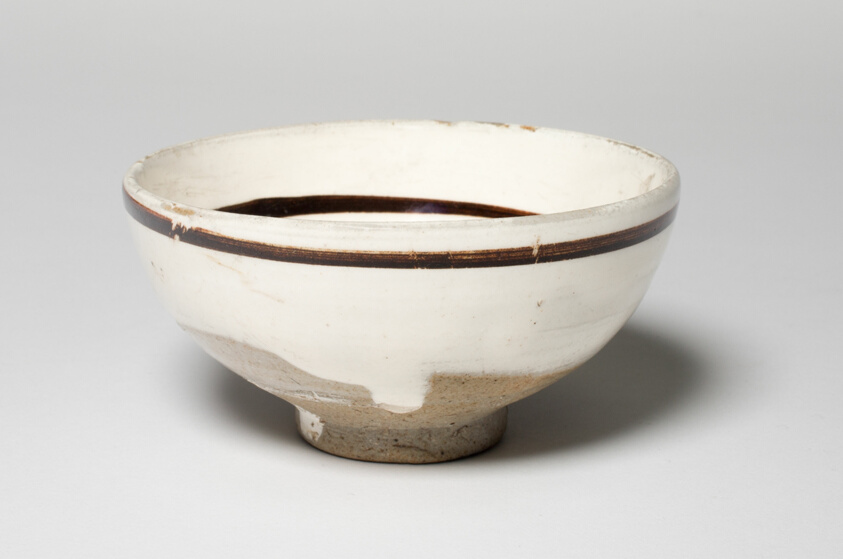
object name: Vessel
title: Bowl with Stylized Leaves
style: Chinese (culture or style)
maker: China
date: Jin dynasty (1115–1234) or later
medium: Cizhou-type ware, slip-coated stoneware with underglaze iron brown painting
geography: China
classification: bowl; stoneware; dish (vessel); asian art; ceramics; vessel